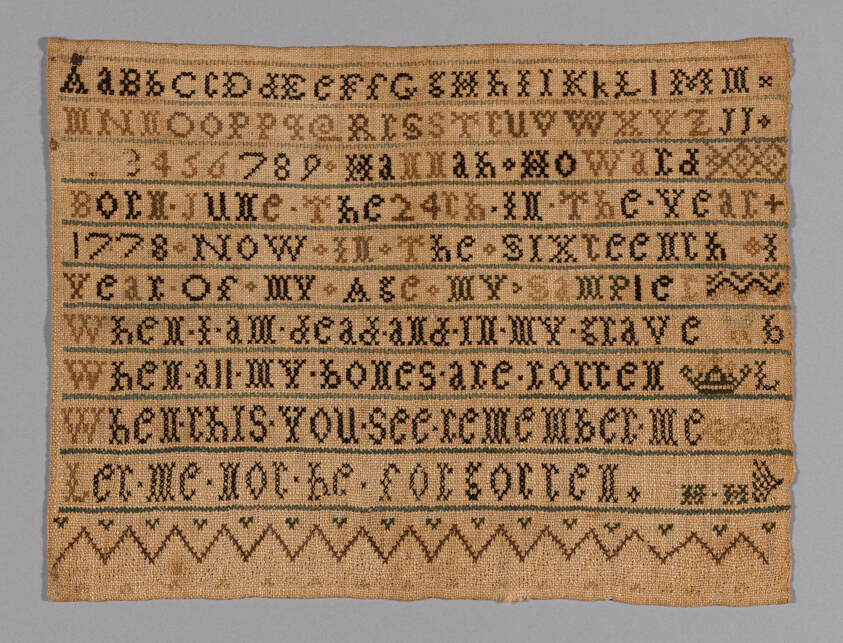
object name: Textile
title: Sampler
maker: Hannah Howard (American, 1778-1864); United States, Massachusetts, probably Easton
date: 1793/94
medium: Linen, plain weave; embroidered with silk floss in cross stitch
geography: Massachusetts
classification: textile; needlework (visual works); sampler